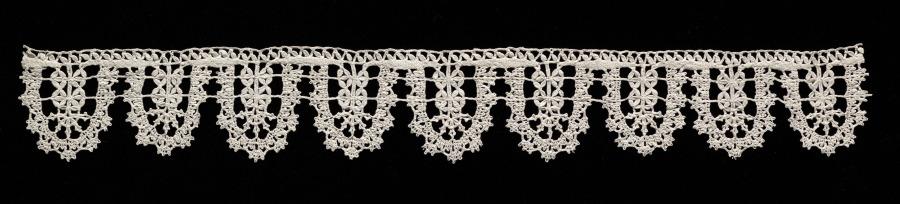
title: Lace Edging of Points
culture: Italy, Genoa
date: 1600s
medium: Bobbin lace (rose lace)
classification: Lace